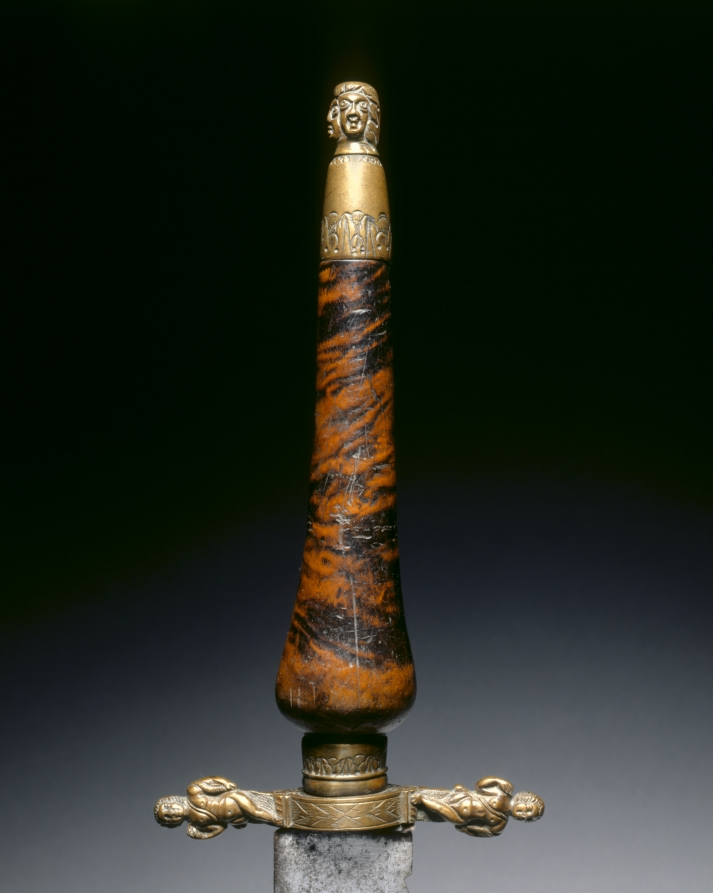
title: Officer's Plug Bayonette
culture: England, 17th century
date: c.1690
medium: steel serrated blade, brass, and wood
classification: Arms and Armor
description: Used increasingly in warfare during the 1600s, the plug bayonet was inserted into the muzzle of a gun to make a weapon with a long shaft. This eventually made the use of pikemen in warfare obsolete as the new musketeer could now continue after having run out of shots.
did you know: The owner's or maker's mark on this blade is unidentified.